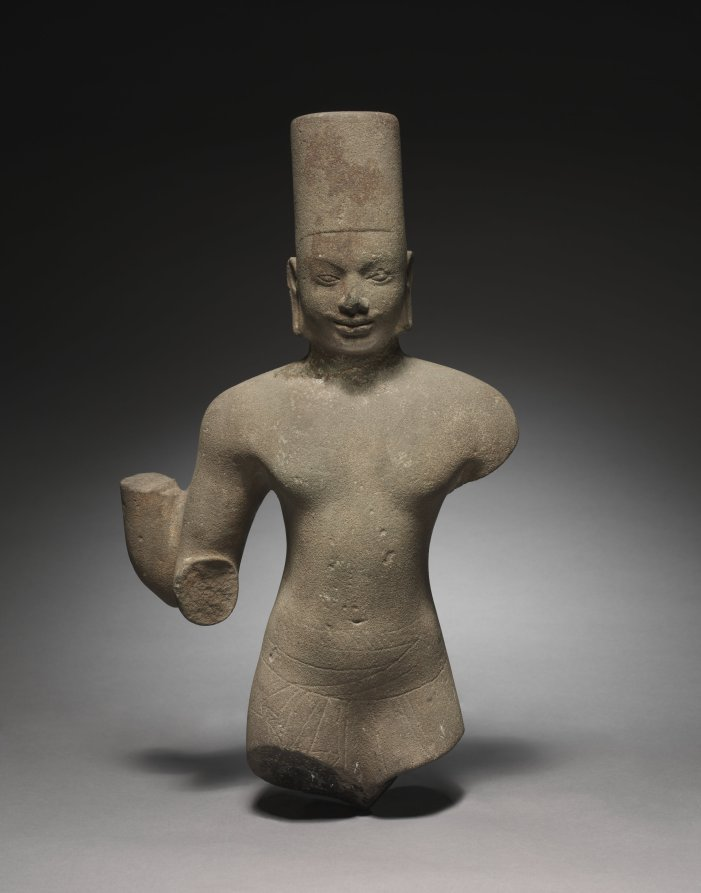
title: Vishnu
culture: Cambodia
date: 650–700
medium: sandstone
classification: Sculpture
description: Vishnu has the features of royalty, indicated by the high mitre-like crown with the flat top, distinctive to types made at the site of Prasat Andet. His status as a god, greater than any earthly king, is indicated by the four arms, traces of which are still visible. The sensitive rendering of the eyes and slight smile are characteristics of Cambodian sculpture, and during this early period, the form of the body reveals some relatively naturalistic musculature and treatment of the garments. He wears the Southeast Asian lower garment called sampot, around which his upper garment is loosely tied. It is Vishnu who incarnates himself into the world in avatars, including Krishna and the boar Varaha. Here we see his iconic form as Vishnu himself.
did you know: The deity is four-armed with the arms running parallel from the shoulders and then bifurcating at the elbows.